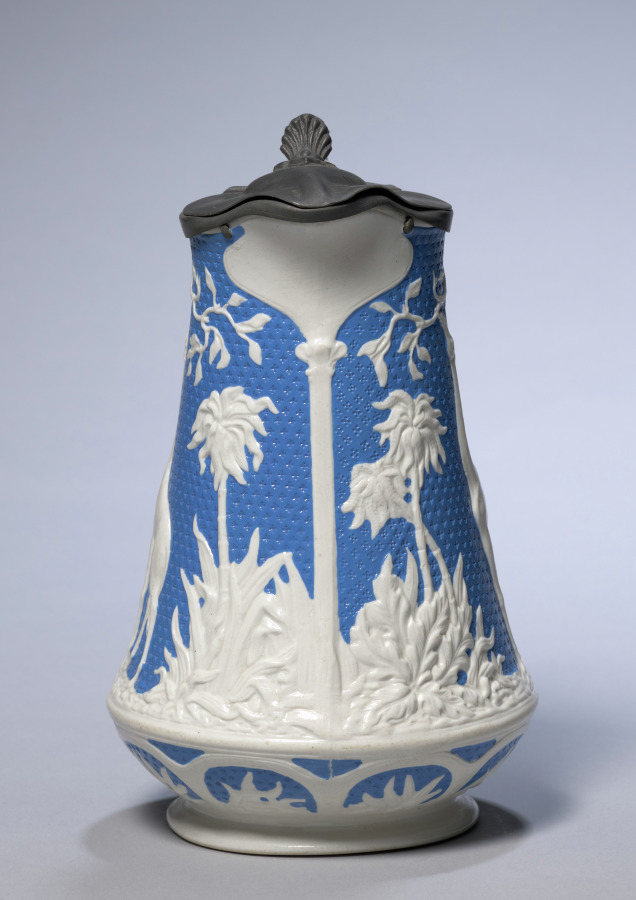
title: Jug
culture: England, Staffordshire, Burslem, 19th century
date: 1850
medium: parian ware with metal rim and cover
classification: Ceramic